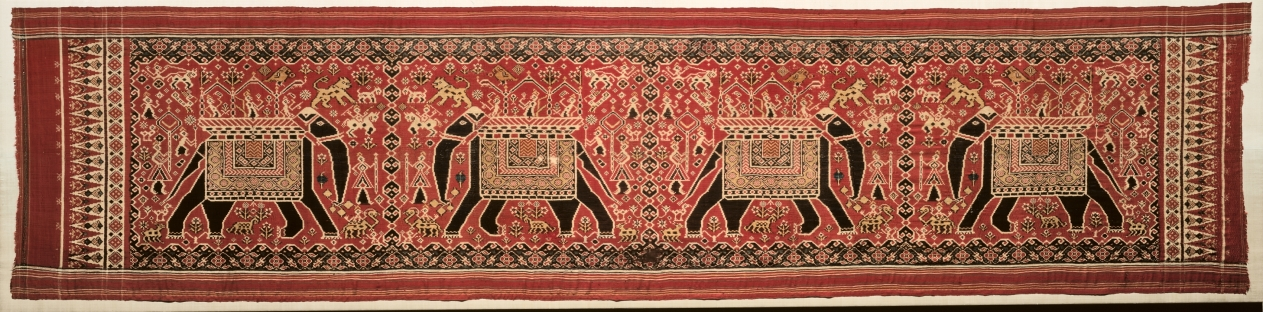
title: Patolu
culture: India, Gujarat, 19th century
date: 19th century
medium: tabby weave, double ikat; silk and cotton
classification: Textile